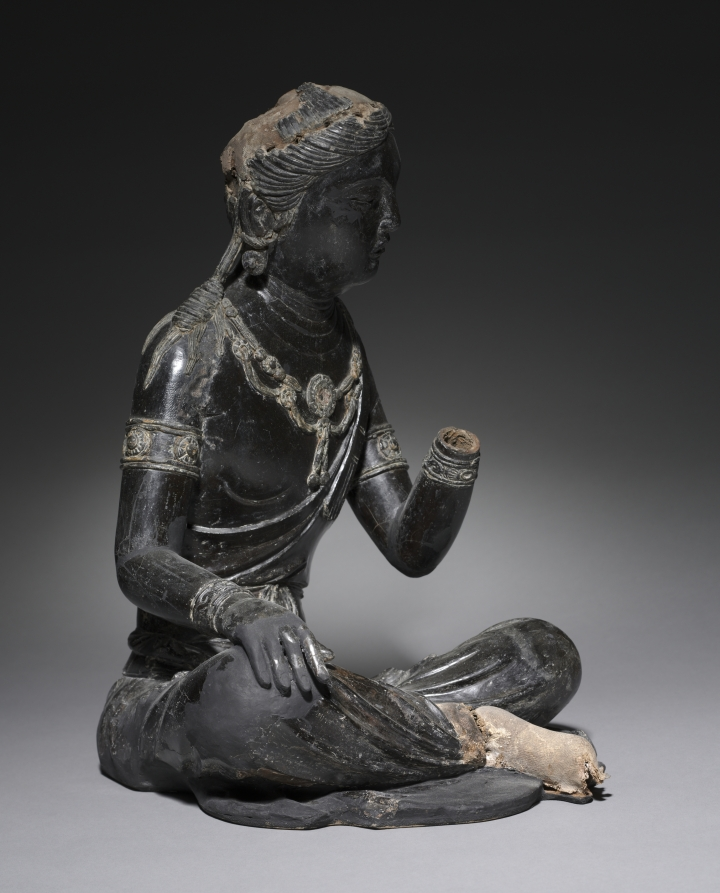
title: Bodhisattva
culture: China, Tang dynasty (618-907)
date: 700s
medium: dry lacquer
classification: Sculpture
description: The bodhisattva, an enlightened being dedicated to the spiritual awakening of all beings, is shown sitting in a relaxed pose, the eyes half-closed in an expression of profound meditation. The statue is modeled in a sensuous manner. It is made using the dry lacquer technique whereby a clay core is first constructed and then overlaid with fabrics saturated with lacquer. Once the lacquer layers are set, the core is removed. This kind of hollow dry lacquer statue is lightweight and easy to carry. The piece once suffered from severe surface retouching that distorted its original beauty. The museum's conservation work has removed coats of overpainting and over-restoration, revealing the true appearance of the glossy black lacquered surface with traces of cut-gold decoration and pigments.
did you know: While lacquer is tough and impervious to insects, it is less durable than wooden or stone sculptures, so this is a rare surviving Tang example.